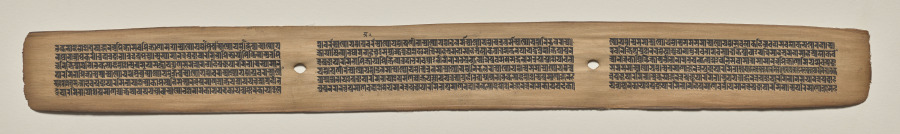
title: Text, folio 165 (recto), from a Manuscript of the Perfection of Wisdom in Eight Thousand Lines (Ashtasahasrika Prajnaparamita-sutra)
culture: Eastern India, Bihar, Vikramashila Monastery. Painting: Nepal, Kathmandu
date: Sunday, September 14, 1119 (year 239 of the Newar Samvat in the month of Ashvina)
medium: gum tempera and ink on palm leaves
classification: Painting